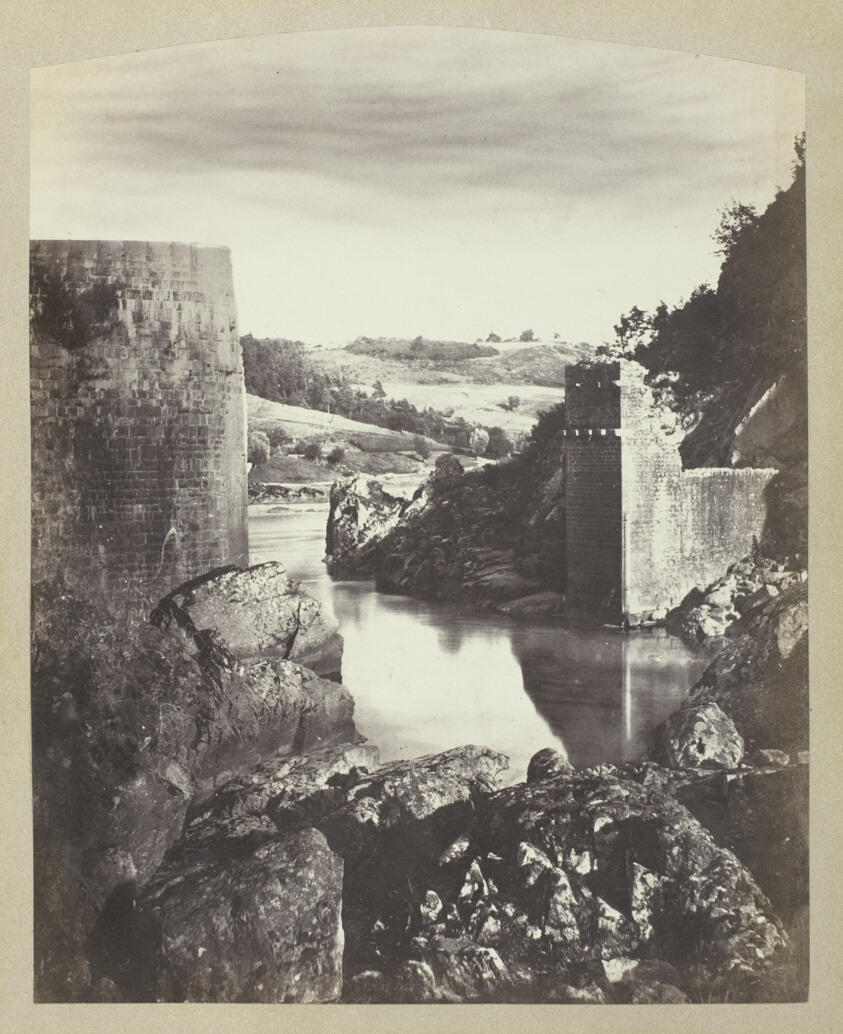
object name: Photograph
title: Landscape with Ruin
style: 19th century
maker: Félix Thiollier (French, 1842-1914)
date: c. 1870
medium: Albumen print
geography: France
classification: albumen silver print; photographic process; photography; photograph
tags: traditional landscapes, photography, landscapes